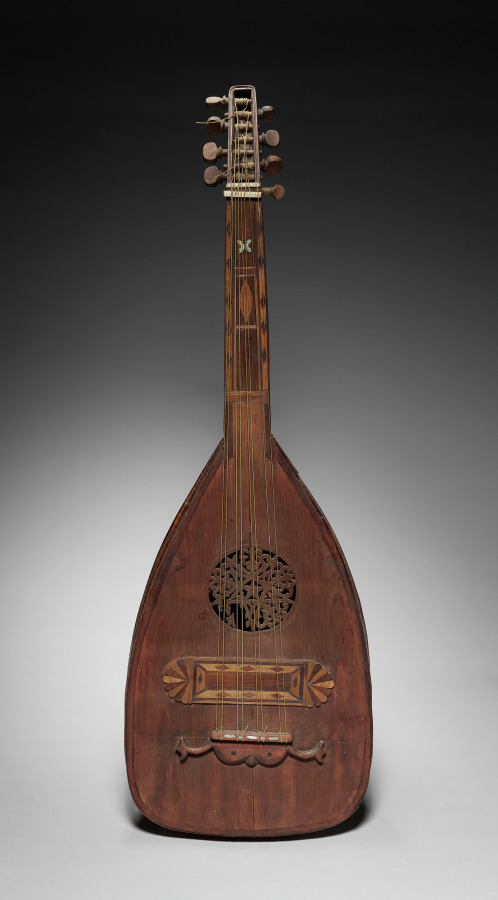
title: Lute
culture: Italy, Venice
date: 1300s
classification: Musical Instrument